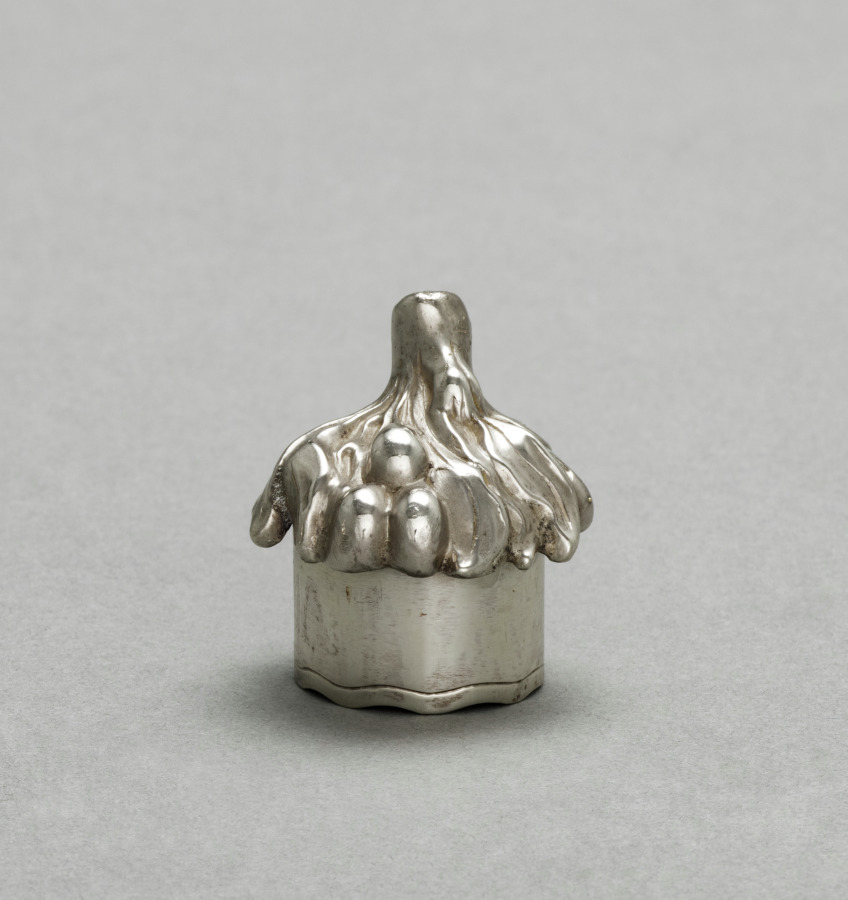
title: Cruet Stand (Bottle Cover)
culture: France, bottle and cover old, but probably not original, 18th Century(?)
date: 1700s(?)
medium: silver and glass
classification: Metalwork